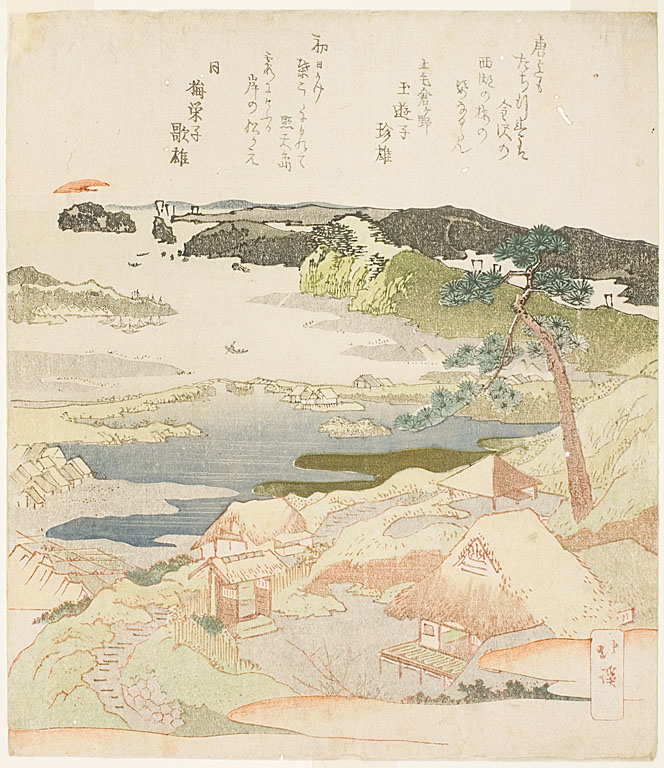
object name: Print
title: Sunrise on New Year's Day at Kanazawa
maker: Totoya Hokkei (Japanese, 1780-1850)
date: early 19th century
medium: Color woodblock print; surimono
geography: Japan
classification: woodblock print; print; asian art